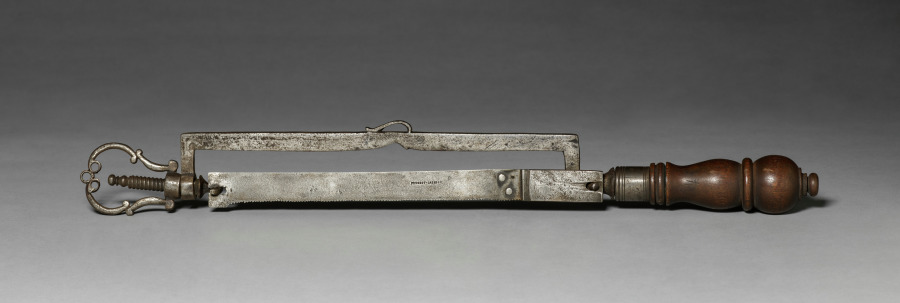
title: Hacksaw with Blade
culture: Europe, 18th century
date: 1700s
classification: Tool